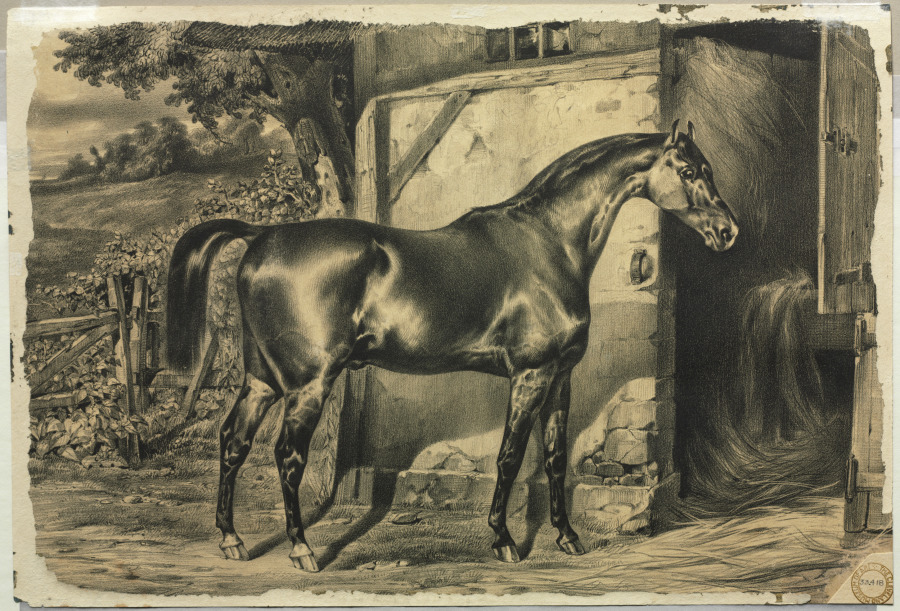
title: Horse in Front of a Barn (verso)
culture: France, 19th century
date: c. 1820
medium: lithograph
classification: Print